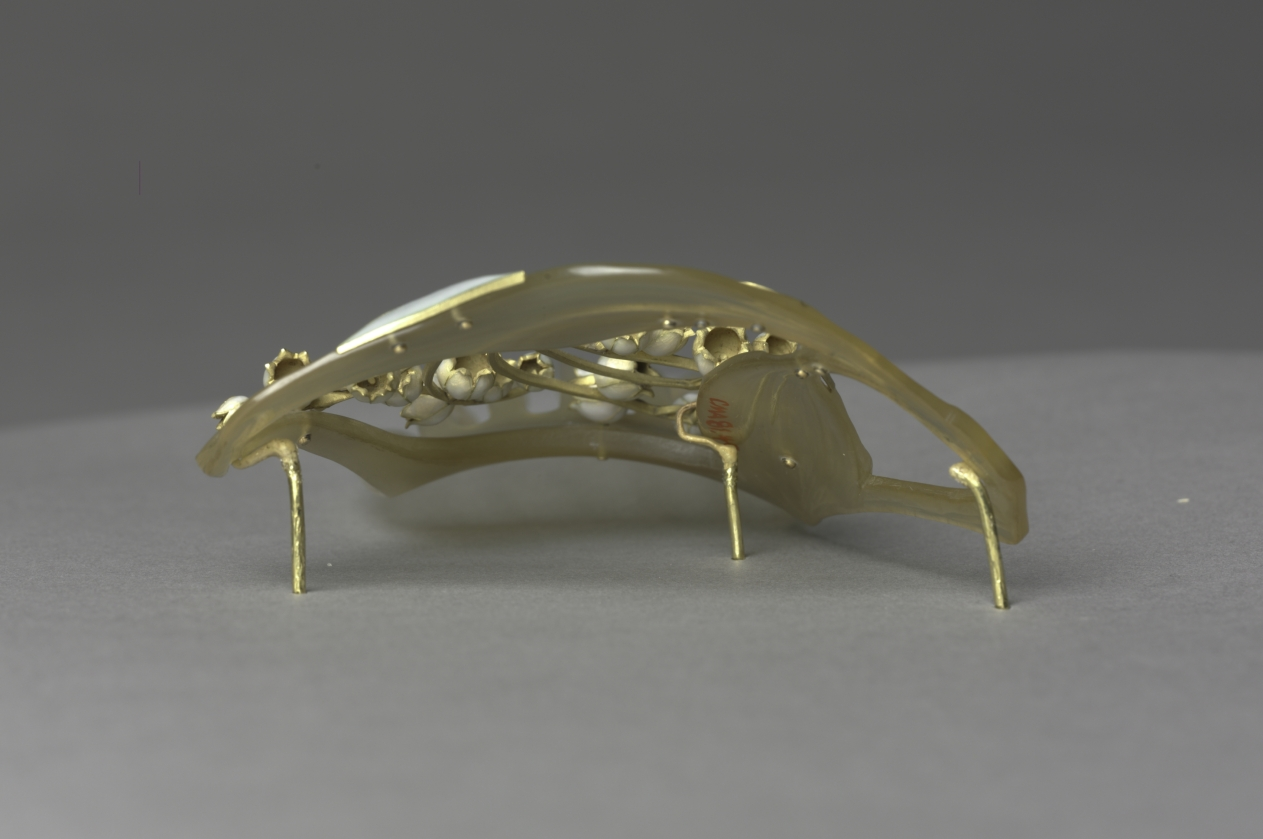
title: Lily of the Valley Comb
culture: France, early 20th Century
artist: René Lalique (French, 1860–1945)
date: c. 1900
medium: horn, enamel and gold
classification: Jewelry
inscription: Engraved on side of gold stem: "LALIQUE"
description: This comb was purchased by Cleveland native Jeptha Homer Wade II from Lalique after admiring the designer's work at the 1900 Exposition Universelle in Paris, probably for his wife Ellen Garretson Wade. Pearlescent horn forms the leaves of the lily of the valley, out of which the delicate, bell-shaped enamel flowers emerge.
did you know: Lalique valued the use of horn for its transparent qualities and natural color.